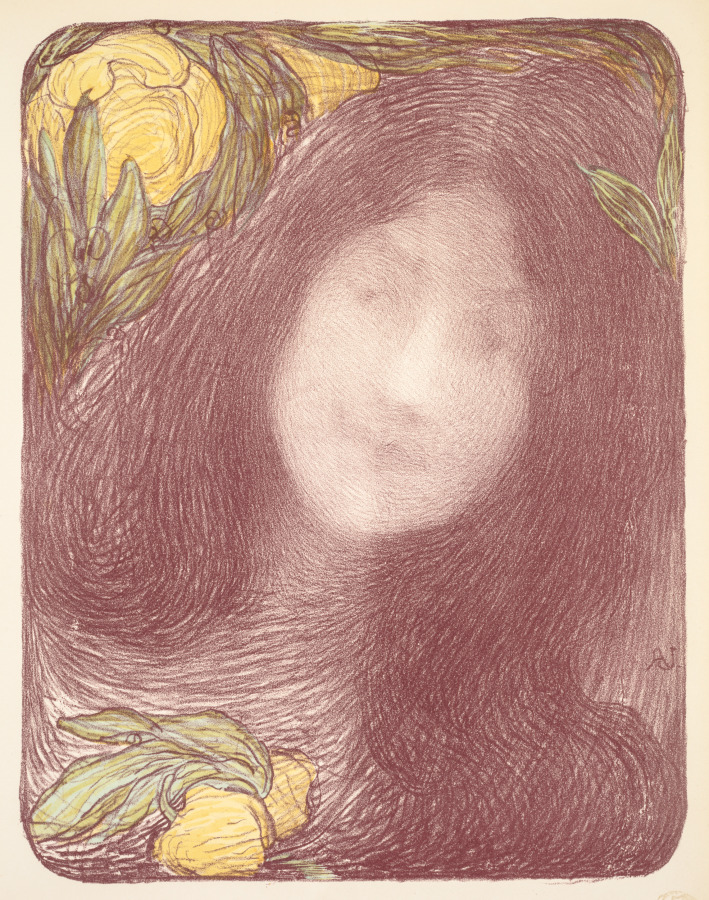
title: Under the Flowers (Sous les Fleurs)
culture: France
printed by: Imprimerie Champenois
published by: : L'Estampe moderne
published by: Edmond François Aman-Jean (French, 1858–1936)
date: published 1897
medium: Color lithograph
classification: Print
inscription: On stone: AJ